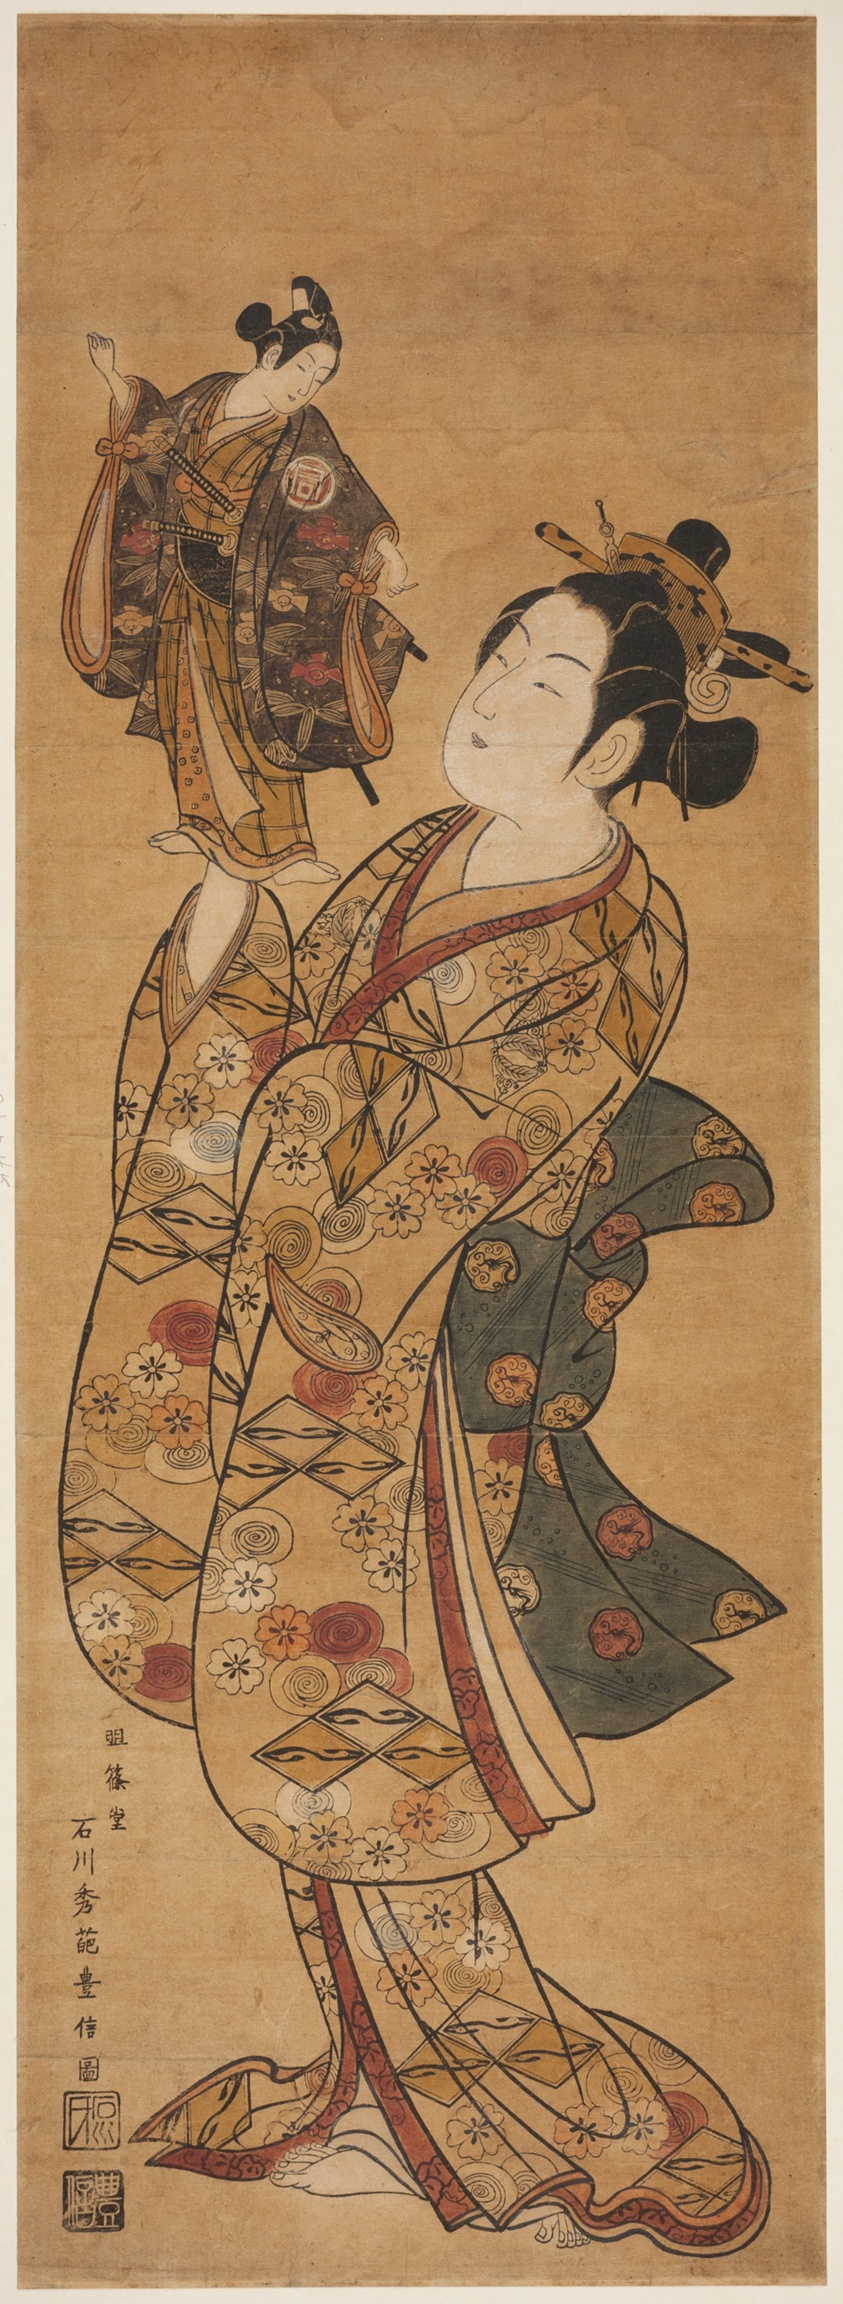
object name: Print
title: The Actor Onoe Kikugoro I holding a puppet of the Actor Sanogawa Ichimatsu I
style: Japanese (culture or style)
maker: Ishikawa Toyonobu (Japanese, 1711-1785)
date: c. 1740s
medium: Hand-colored woodblock print; vertical oban diptych, sumizuri-e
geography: Japan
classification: woodblock print; print; asian art